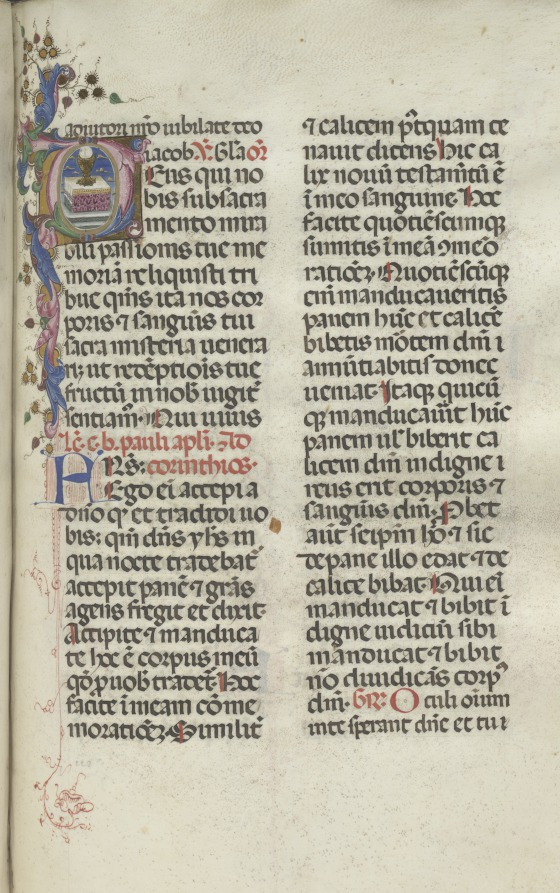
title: Missale: Fol. 225: Chalice with Host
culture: Italy, Perugia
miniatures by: Bartolommeo Caporali (Italian, c. 1420–1503)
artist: assisted by Giapeco Caporali (Italian, d. 1478)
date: 1469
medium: ink, tempera and burnished gold on vellum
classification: Bound Volume